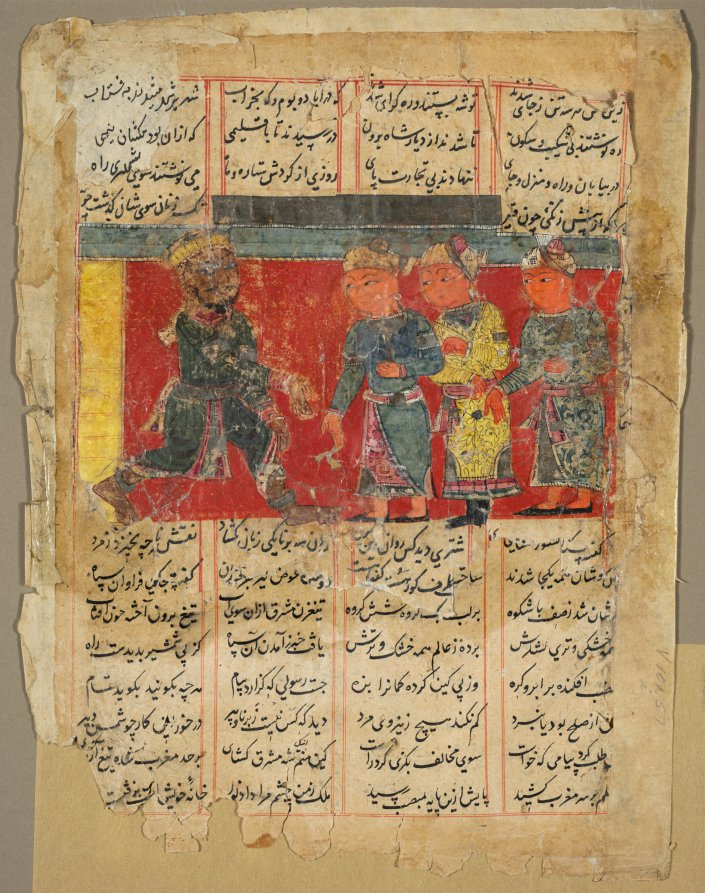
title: An East African King Receives Three Emissaries, from a Khamsa of Amir Khusrau Dihlavi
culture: India, Sultanate period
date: c. 1450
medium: gum tempera and ink on paper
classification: Painting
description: The text on this page discusses the wars between Morocco and Zang, a region of eastern Africa centered in present-day Ethiopia. In the painting the King of Zang meets three envoys. The dramatic gesture of the Zangi king, who stretches out one hand as he takes an enormous stride toward the envoys, identifies him as a powerful, assertive figure. This page is from the first known manuscript of a Persian literary text illustrated by an Indian artist, who had probably been trained in the Jain manuscript tradition. The figures are arranged on one plane in a straight line against a flat red background, typical of manuscript painting in India in the 1400s.